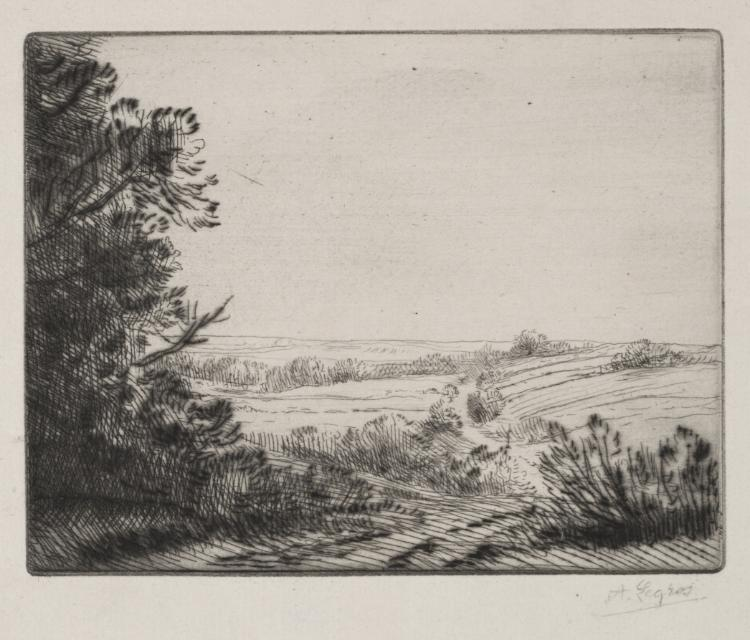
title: Landscape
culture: France, 19th-20th century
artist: Alphonse Legros (French, 1837–1911)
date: c. 1857–1911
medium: etching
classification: Print